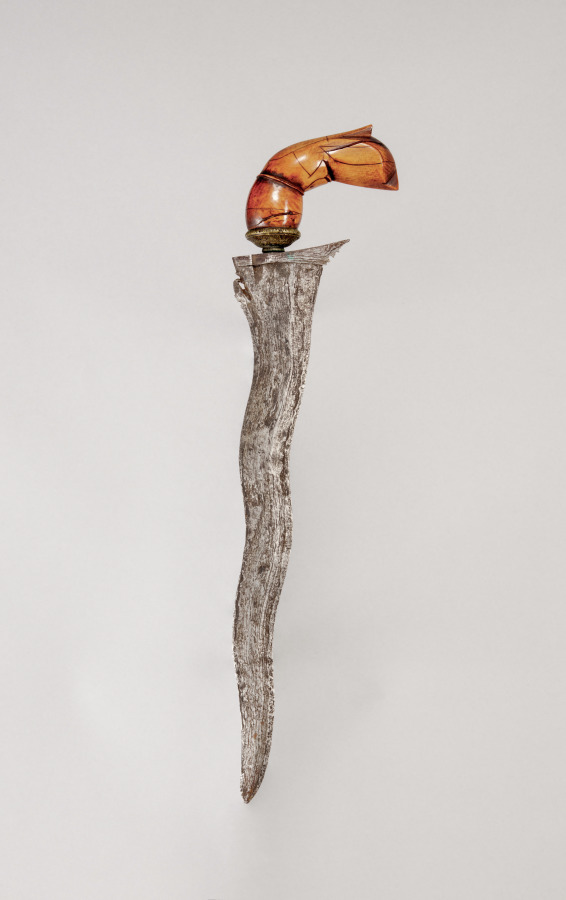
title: Sword (Kris)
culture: Java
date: 1800s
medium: iron with wooden handle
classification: Arms and Armor